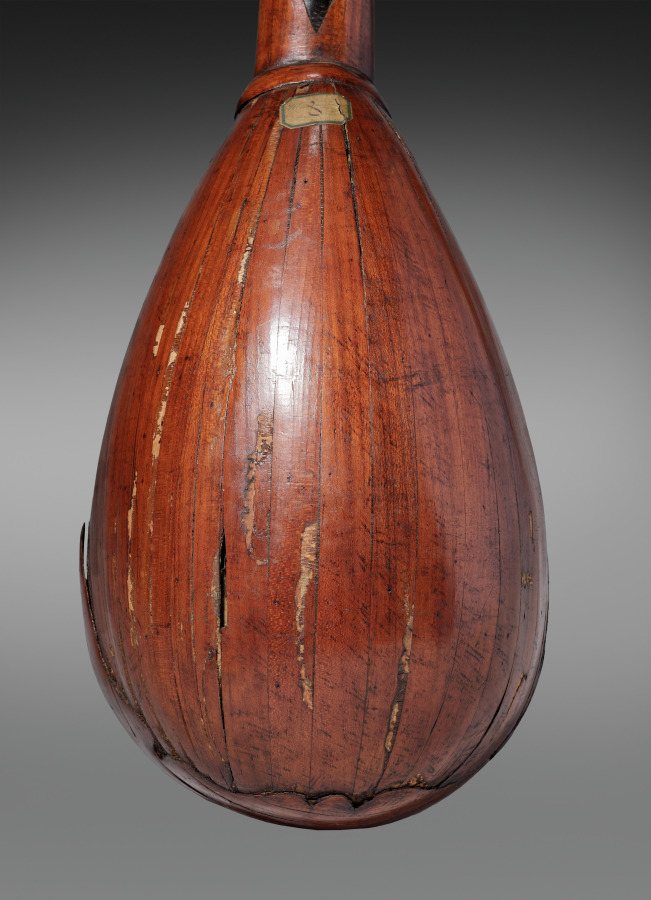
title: Pandurina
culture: Italy, 15th century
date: 1400s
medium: varnished wood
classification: Musical Instrument